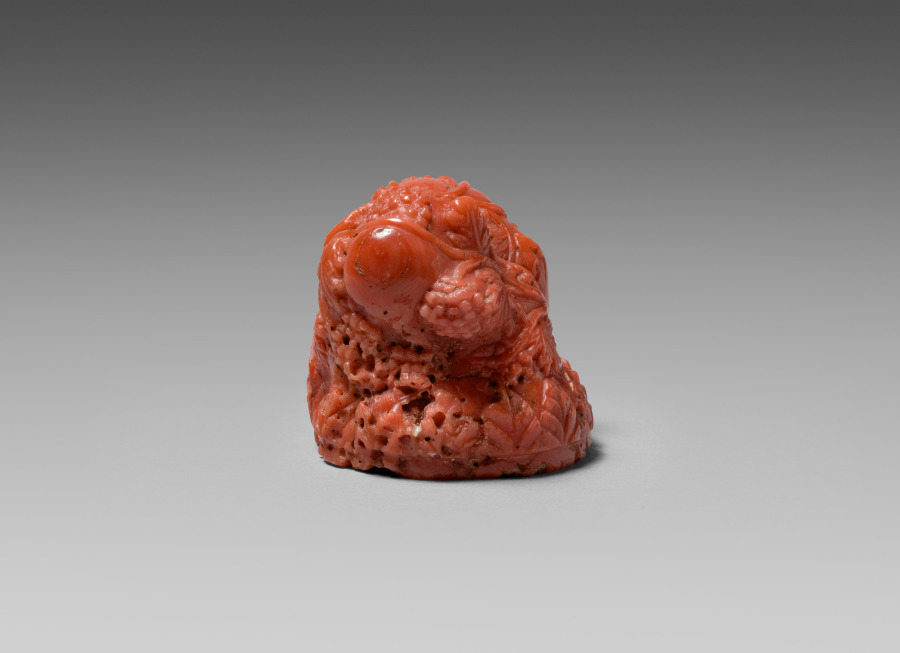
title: Sword Hilt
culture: Pakistan, Gandhara, Kushan period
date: c. 100s–200s CE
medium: coral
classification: Sculpture